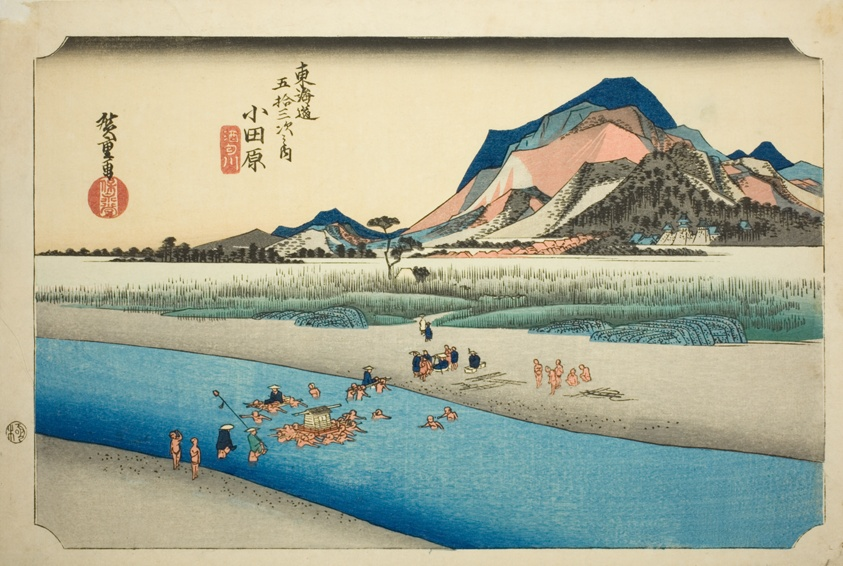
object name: Print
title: Odawara: The Sakawa River (Odawara, Sakawagawa), from the series "Fifty-three Stations of the Tokaido Road (Tokaido gojusan tsugi no uchi)," also known as the Hoeido Tokaido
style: Japanese (culture or style)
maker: Utagawa Hiroshige 歌川 広重; Japanese, 1797-1858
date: c. 1833/34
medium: Color woodblock print; oban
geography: Japan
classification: woodblock print; print; asian art